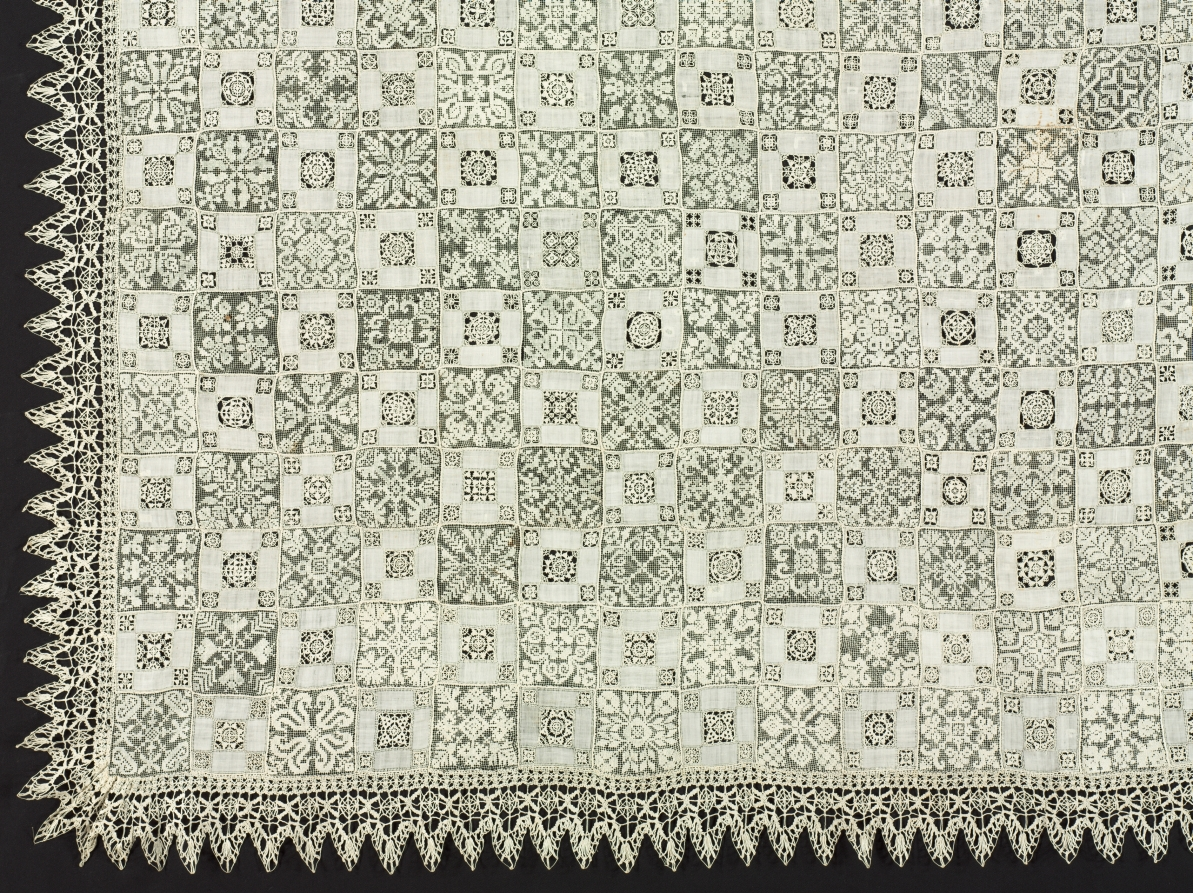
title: Cloth with Floral and Vegetal Patterns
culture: Italy, late 1500s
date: 1560–1600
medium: Bleached linen (est.): needle lace, filet/lacis (knotted ground and darned in two directions), alternating reticella squares (open cutwork), and bobbin lace edging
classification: Lace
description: Textiles often incorporate multiple needlework techniques within a single piece. One of the main techniques in this example of lace is called cutwork. In cutwork, portions of the textile ground, such as a linen or cotton cloth, are cut away and threads are removed to create holes. The edges of the hole are then reinforced with embroidery and a pattern of needle lace can be created within the perimeter. Rather than adding to the cloth to create a design, the craftsperson removes threads to fabricate a pattern.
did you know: The large size and square shape suggest that this textile would likely have been used as a table cloth.